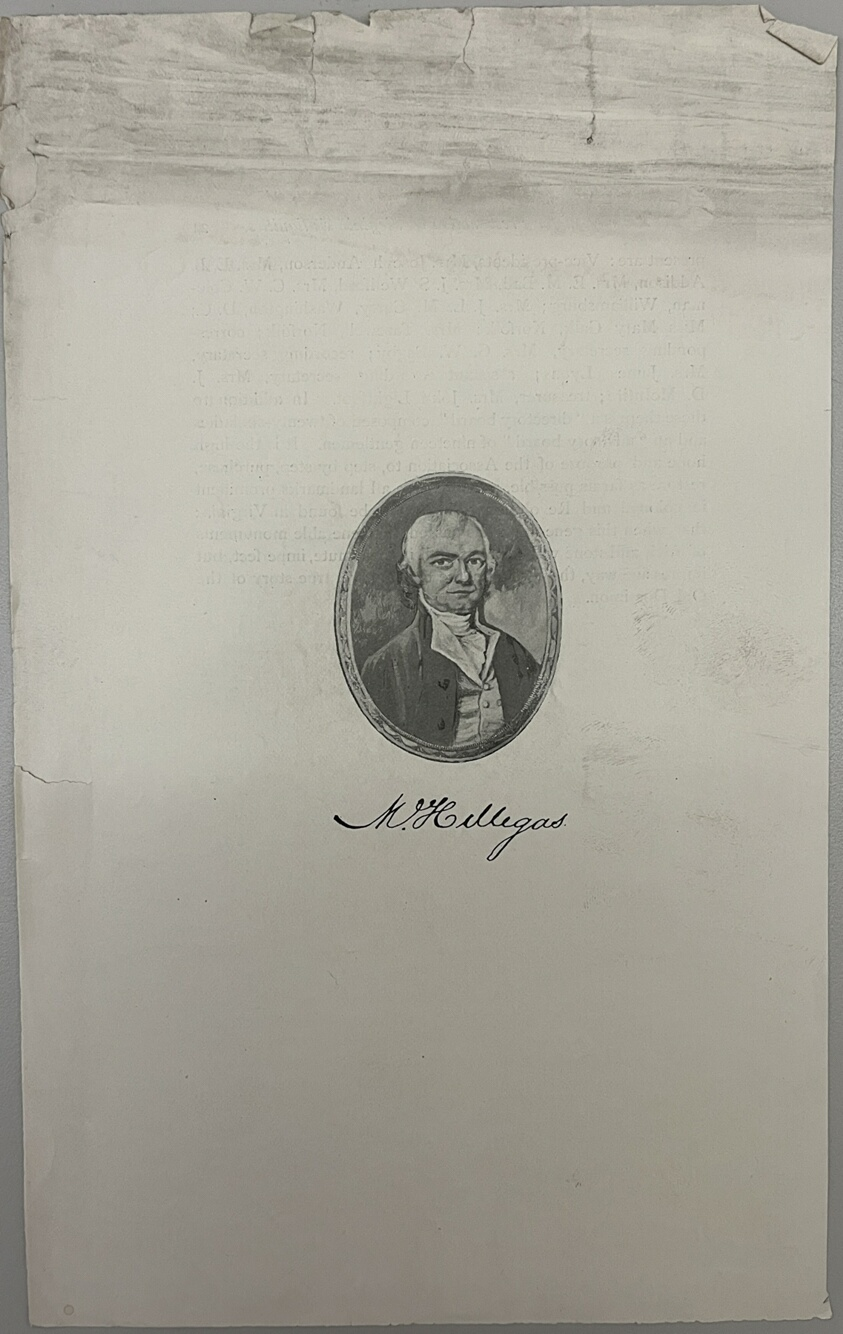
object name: Print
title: Michael Hillegas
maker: Artist Unknown (Likely American or British, 19th century)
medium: Lithograph on paper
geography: United States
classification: reproduction; print; prints and drawing